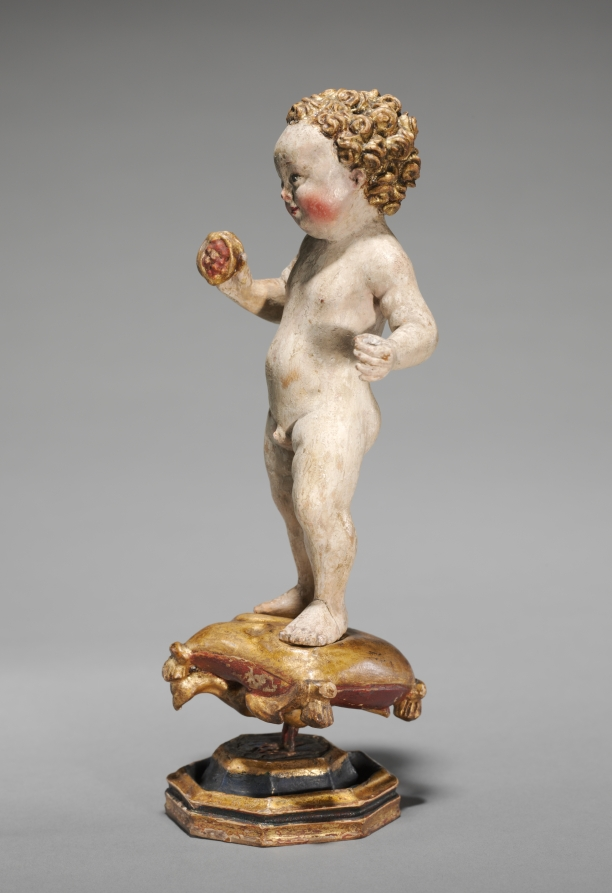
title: The Christ Child Holding a Pomegranate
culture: South Germany, 16th century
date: c. 1510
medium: painted wood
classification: Sculpture